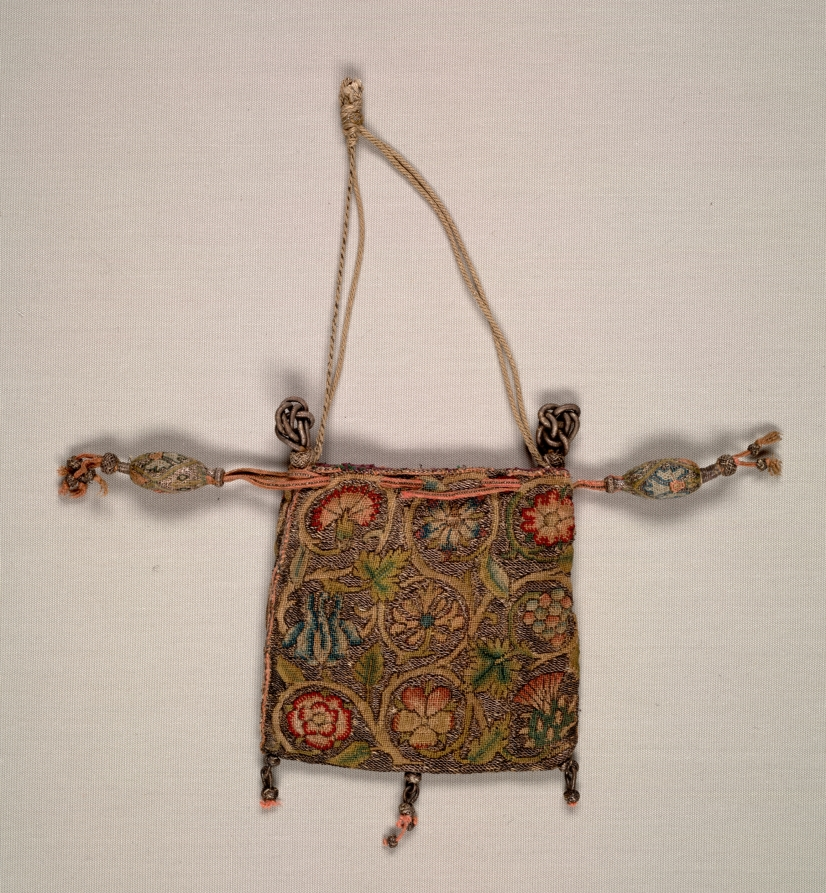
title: Purse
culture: England, early 17th century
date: early 1600s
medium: embroidery; silk and silver filé on linen ground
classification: Embroidery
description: According to Elizabethan embroidery scholar Jacqui Carey, the scale and construction of this purse and its trimmings are typical of a so-called ‘sweet bag’, a container for sweet-smelling substances. This term was popularized in George Wingfield Digby’s 1963 publication on Elizabethan embroidery; Digby used the term to describe small English purses dating from the 1500s and 1600s. In CMA’s example, the handle and lining look to be later replacements. The embroidery is worked on an open plain weave linen fabric with silk in a range of colors and silver metal thread (thin metallic strips wrapped around a white silk core). In places, the inked design is visible on the linen. The stitches used for the purse’s background are unusual in that they lie horizontally rather than vertically. The rectangle of embroidered fabric was folded along the base and stitched together up the sides. Ten holes are pierced through the embroidered fabric near the top edge of the purse. Two drawstrings, terminating in ornate tassels, are threaded through the holes. The nine floral motifs-- carnation, borage, rose, columbine, honeysuckle, grapes, rose, pansy and thistle—set within coiling stems and foliage are typical of the period. Two embroidery stitches were used, tent stitch and Elizabethan ground stitch.